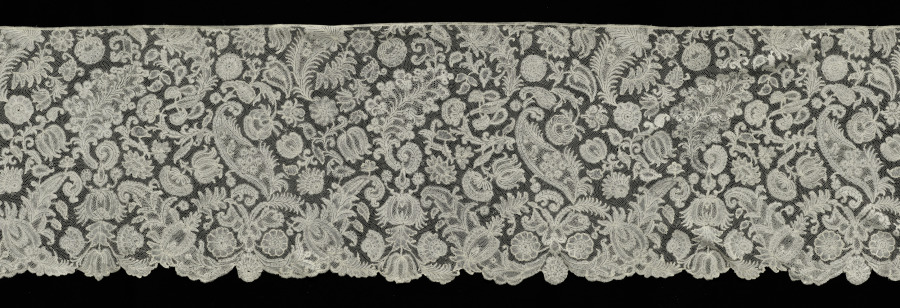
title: Lace Edging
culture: Belgium, Brussels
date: 1700s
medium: Linen: bobbin lace (Point d'Angleterre)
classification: Lace